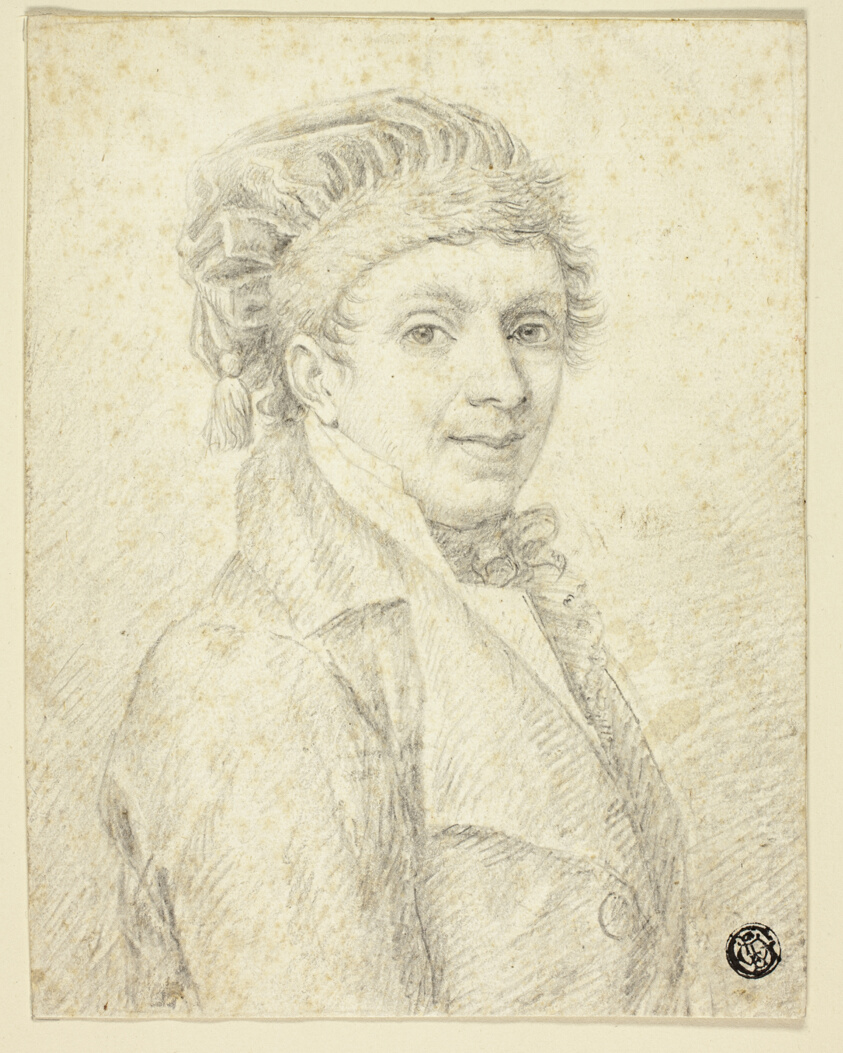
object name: Drawing and Watercolor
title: Bust of Man in Hat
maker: Johann Elias Ridinger (German, 1698-1767)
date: 1800-1899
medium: Graphite on ivory laid paper, mounted to ivory laid paper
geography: Germany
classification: graphite; drawings (visual works); prints and drawing